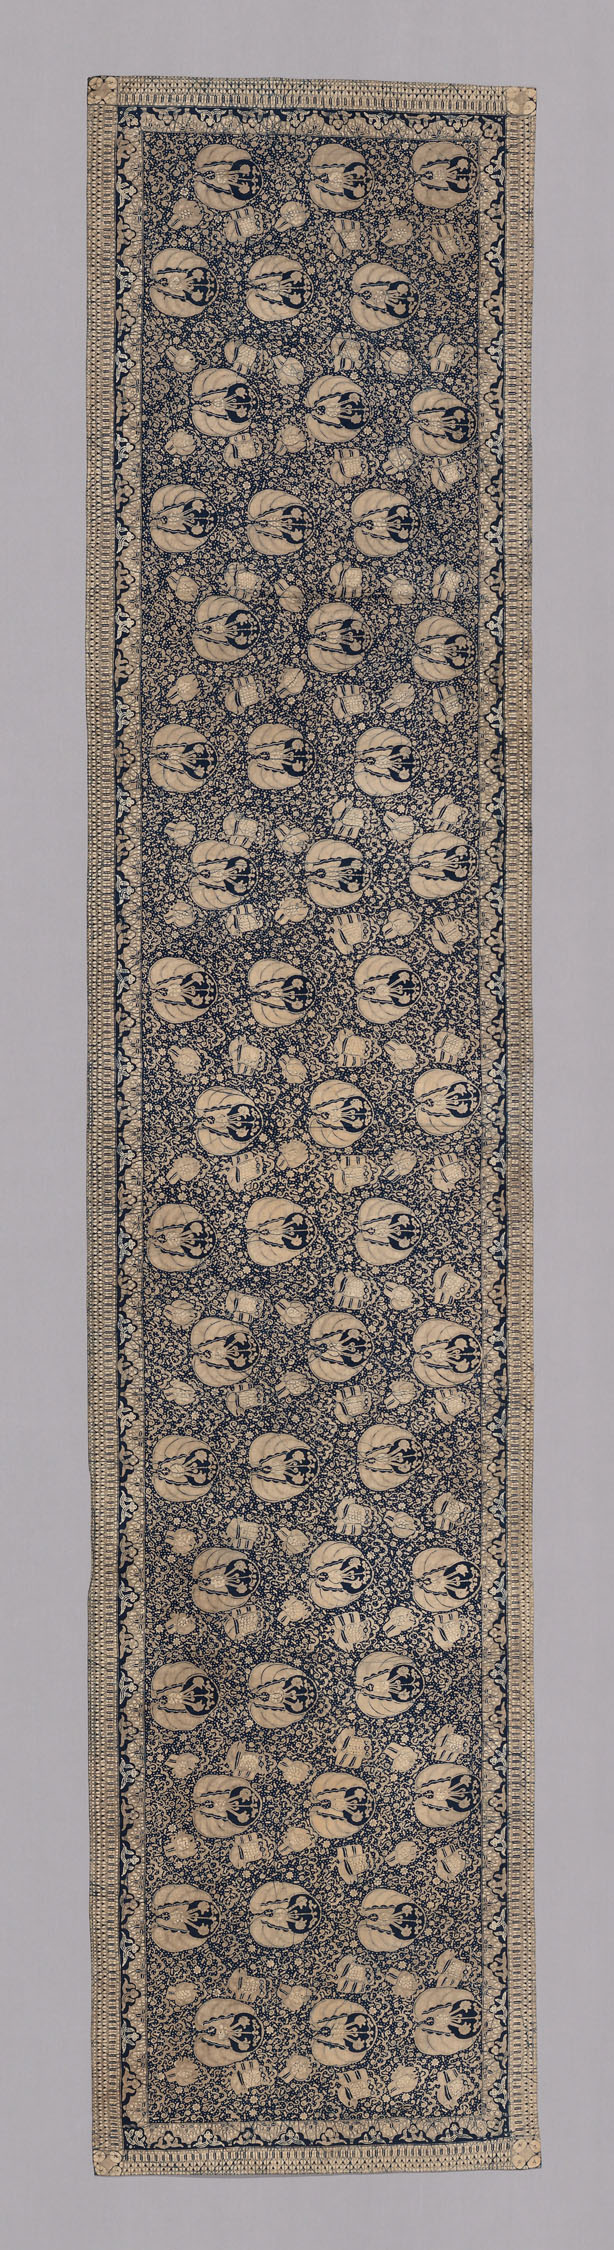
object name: Textile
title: Slendang (Shawl)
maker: Indonesia, Java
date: 19th century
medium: Cotton, batik dyed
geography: Java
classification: textile; weaving; costume; dress (garment); clothing